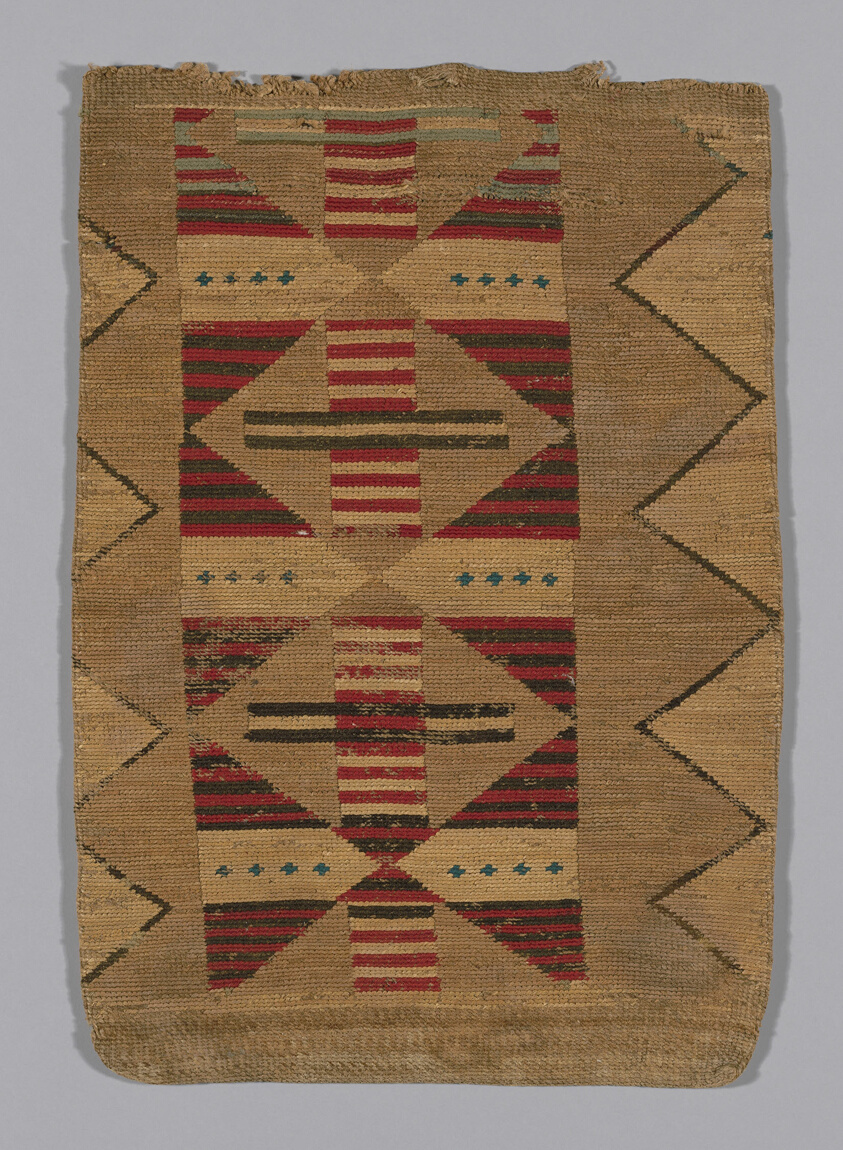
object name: Textile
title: ˀımáˀsp̉alx̣ (Flat Storage Bag)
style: native american, nez percé, nimiipuu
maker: Probably Nez Perce (Nimíipuu); Columbia Plateau, United States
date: c. 1850/70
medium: Bast fiber, 2 strand weft-twining; with wool and cornhusk, supplementary weft-twining (false-embroidery)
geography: Columbia Plateau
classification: textile; bag - weaving; needlework (visual works)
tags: geometric